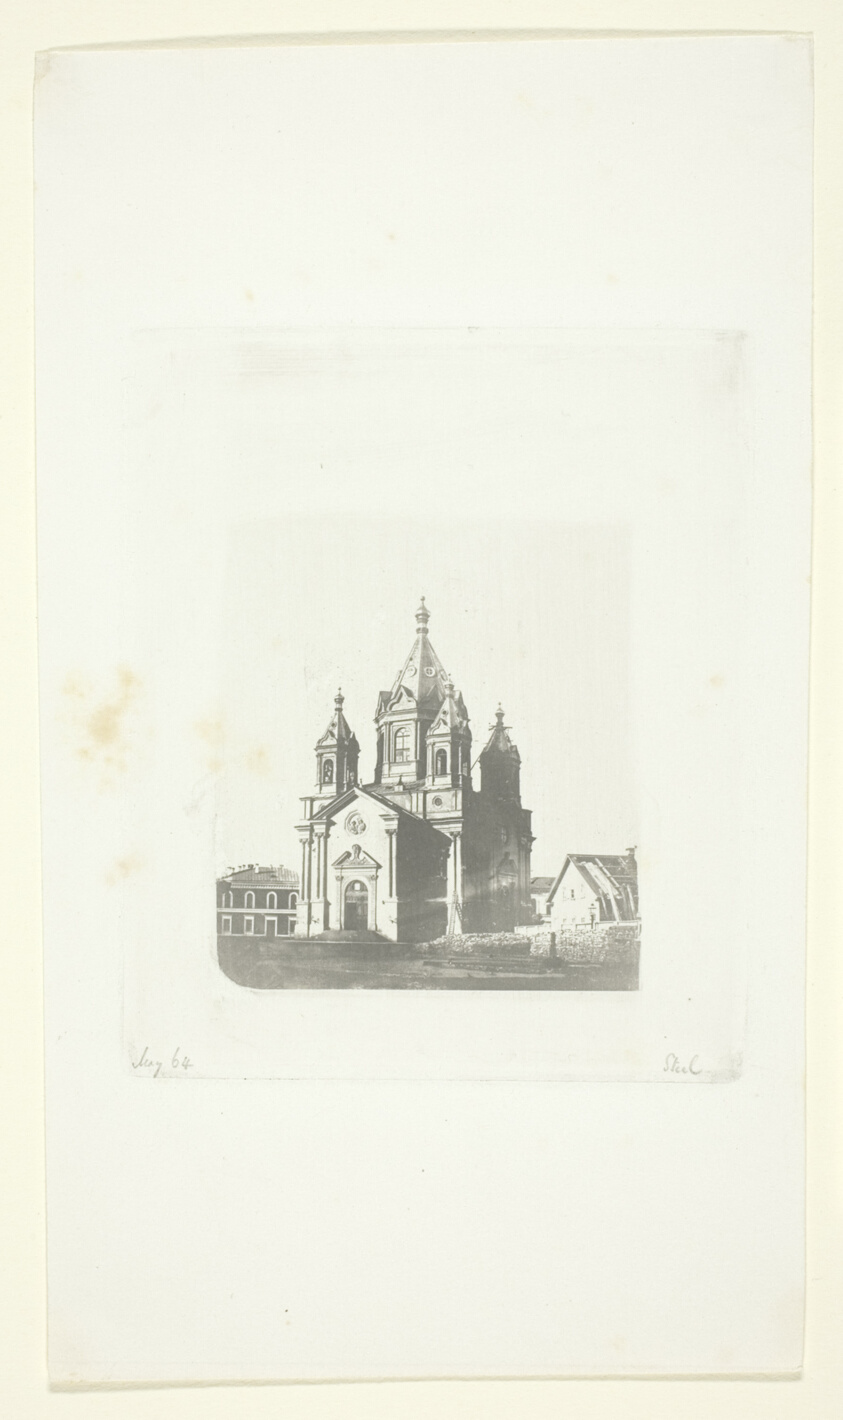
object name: Photograph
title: Untitled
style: 19th century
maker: William Henry Fox Talbot (English, 1800–1877)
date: May 1864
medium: Photoglyphic engraving employing resin ground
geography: England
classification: engraving; printing process; photography; photograph